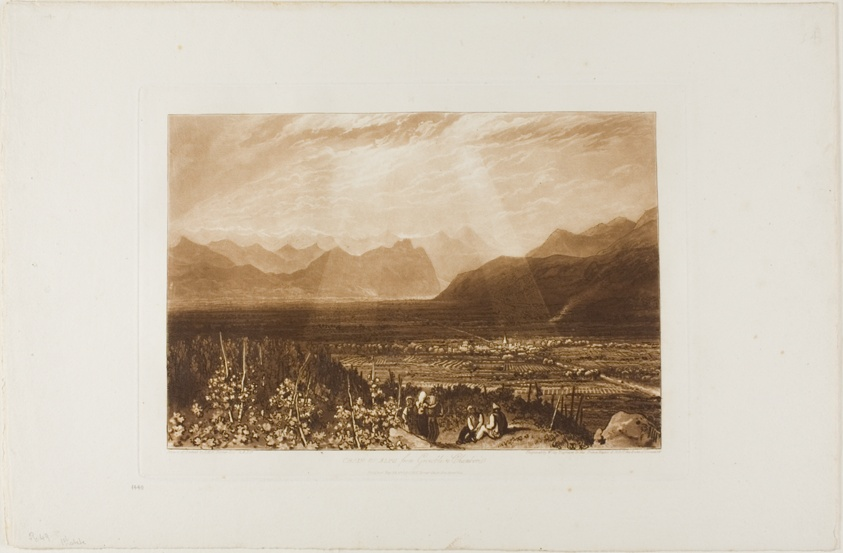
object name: Print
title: Chain of Alps from Grenoble to Chamberi, plate 49 from Liber Studiorum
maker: Joseph Mallord William Turner (English, 1775-1851); engraved by William Say (English, 1768-1834)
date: published May 23, 1812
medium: Mezzotint and etching in brown on ivory wove paper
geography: England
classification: etching; print; prints and drawing